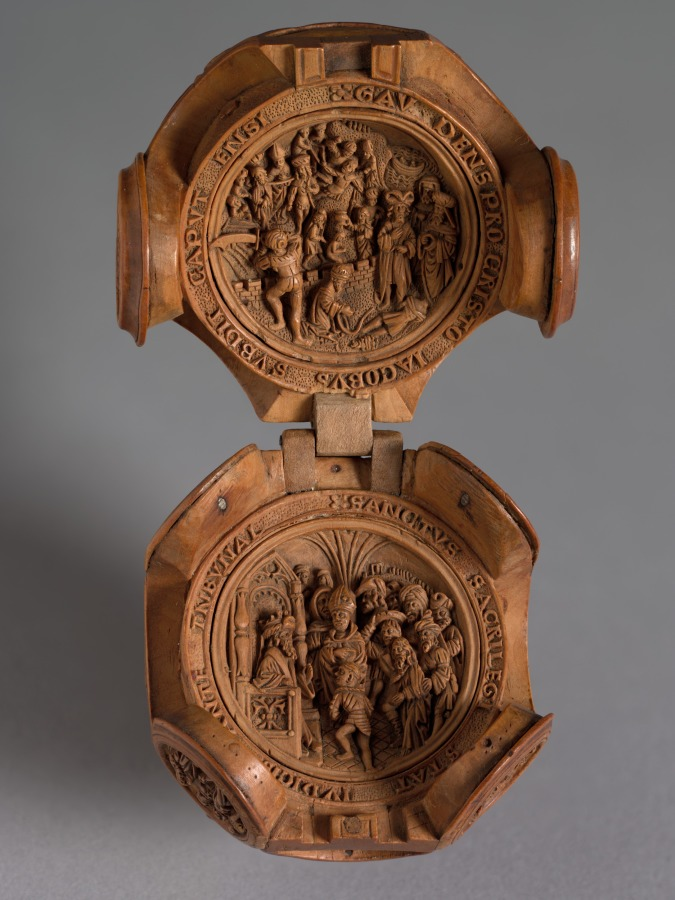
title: Prayer Nut with Scenes from the Life of St. James the Greater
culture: Northern Netherlands (Holland)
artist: Adam Dircksz (Netherlandish, active c. 1500)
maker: and Workshop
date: c. 1500–1530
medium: boxwood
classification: Sculpture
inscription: Interior around lower half: SANCTVS SACRILEGI STAT IVDICIS ANTE TRIBVNAL (Holiness stands before the throne of the profane judge)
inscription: Interior, around upper half: GAVDENS PRO CRISTO IACOBVS SVBDIT CAPVT ENSI (St James submits his head to the sword)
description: Prayer nuts are capsules that can be opened in half and were mainly worn from the end of the 1400s until 1530, particularly in the Netherlands. These objects are generally made from boxwood and carved with extreme refinement and delicacy. They often echo Gothic architecture and include openwork tracery or elaborate decorative patterns. Prayer nuts came into fashion for private devotion as a pendant on the rosary or on a decorative chain. The emergence of prayer nuts went hand in hand with the practice of praying the rosary more frequently at the end of the Middle Ages.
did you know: This miniature masterpiece was held and caressed within the palm of the holder as they prayed and meditated on their faith. What do you use to focus or engage in quiet concentration?